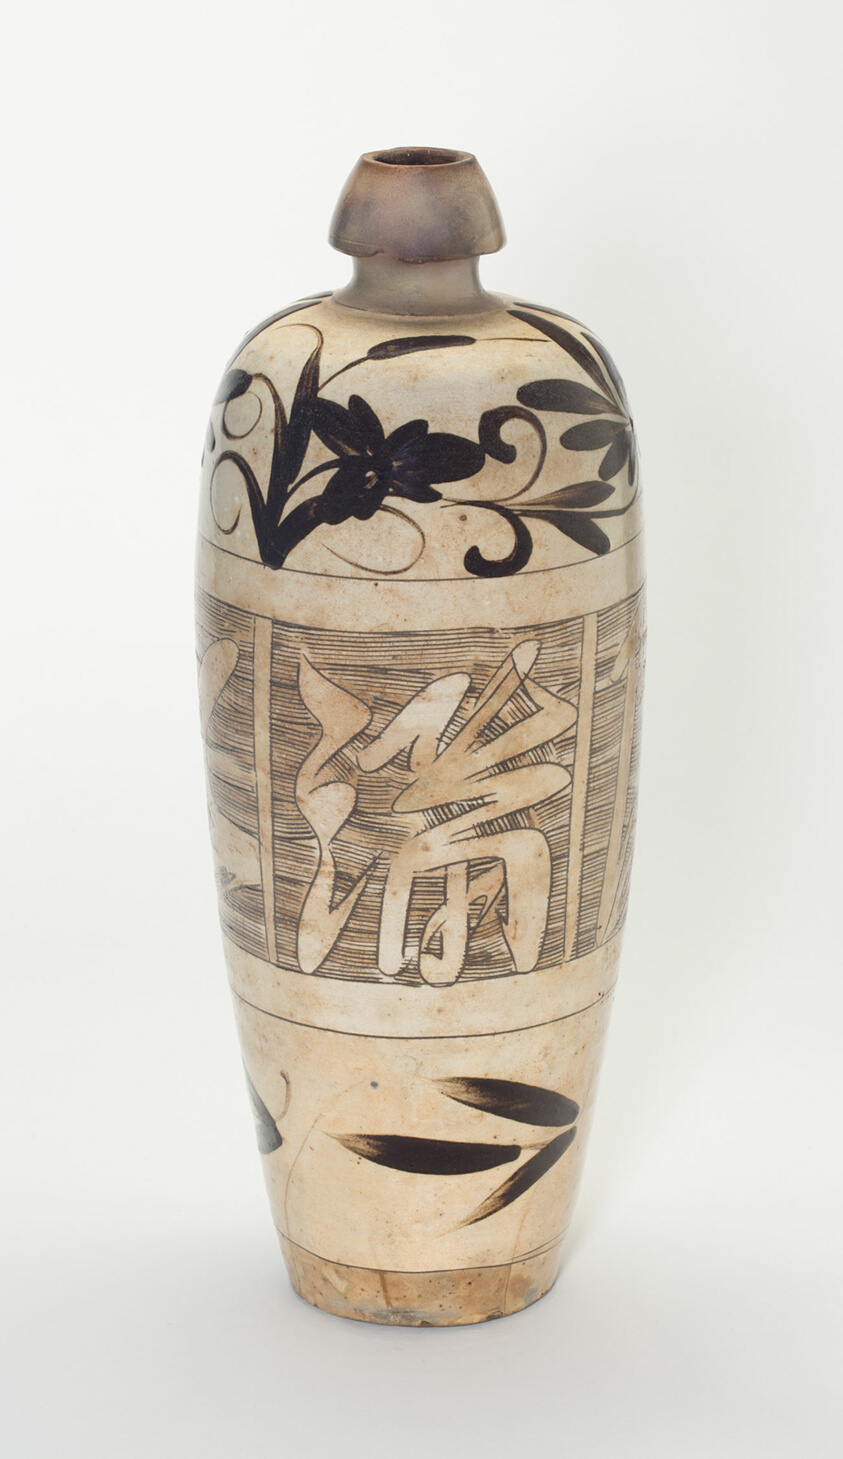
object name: Vessel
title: Elongated Ovoid Vase (Meiping) with Stylized Flowers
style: Chinese (culture or style)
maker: China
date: Jin dynasty (1115–1234), 12th century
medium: Cizhou ware; slip-coated stoneware with incised, combed, and overglaze painting in iron brown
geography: China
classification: vase; vessel; stoneware; asian art; ceramics